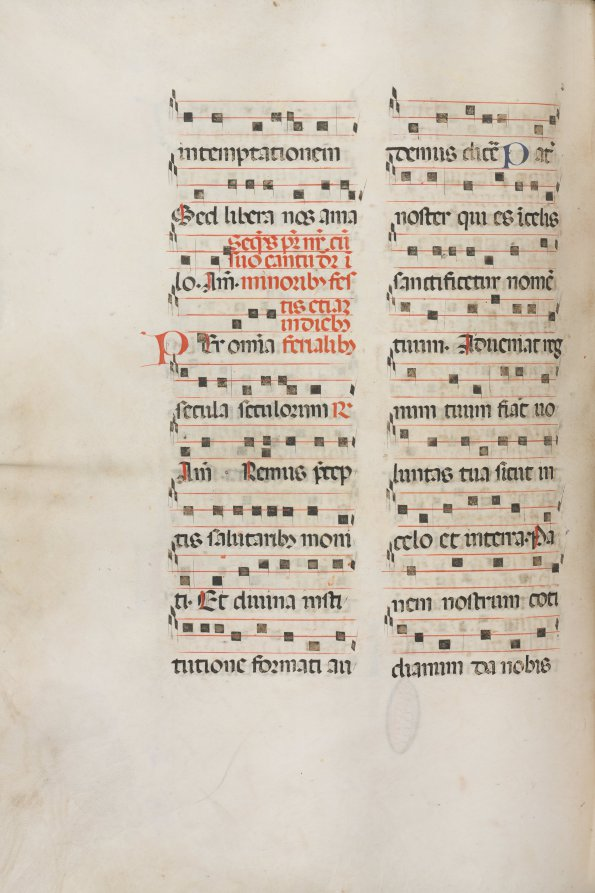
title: Missale: Fol. 189v: Music for various prayers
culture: Italy, Perugia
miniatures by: Bartolommeo Caporali (Italian, c. 1420–1503)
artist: assisted by Giapeco Caporali (Italian, d. 1478)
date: 1469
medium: ink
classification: Bound Volume